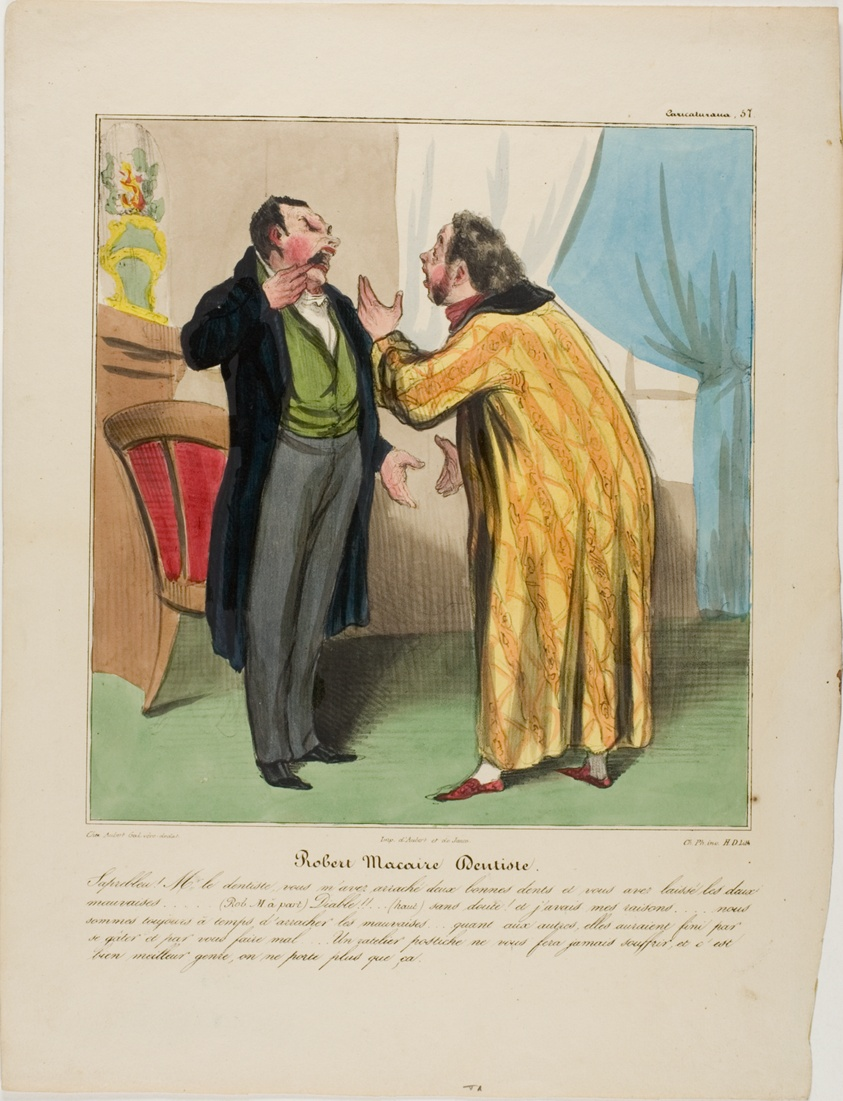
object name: Print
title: Robert Macaire, dentist. “- Damnit Doctor, you pulled out two good teeth and left the two bad ones. - (Robert Macaire aside) Devil!!! … (loud) Of course.... And for a good reason: there will be enough time to pull out the bad ones. The good ones surely would have caused you pain in due time. A dental plate however will not hurt you and is very fashionable right now. Everybody is wearing it, plate 57 from Caricaturana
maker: Honoré Victorin Daumier; French, 1808-1879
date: 1838/39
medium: Lithograph with hand-coloring on paper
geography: France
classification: lithograph; print; prints and drawing